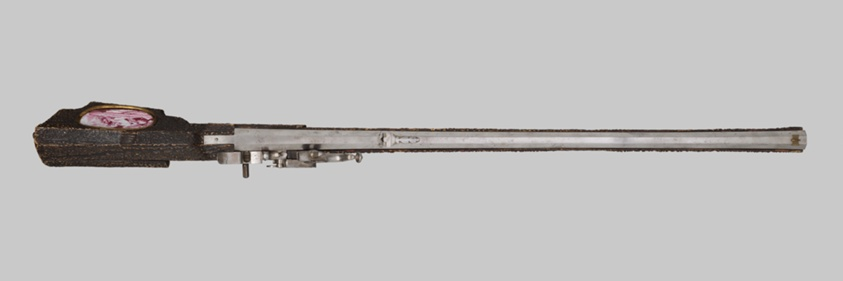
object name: Arms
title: Wheellock Rifle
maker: Elias Becker (German, Augsburg active 1633-1673); Augsburg, Germany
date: c. 1670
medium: Steel, staghorn, cherry wood, beech wood, gilt brass, copper, and enamel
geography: Augsburg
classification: firearm-long gun; arms; decorative arts; european decorative arts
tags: arms